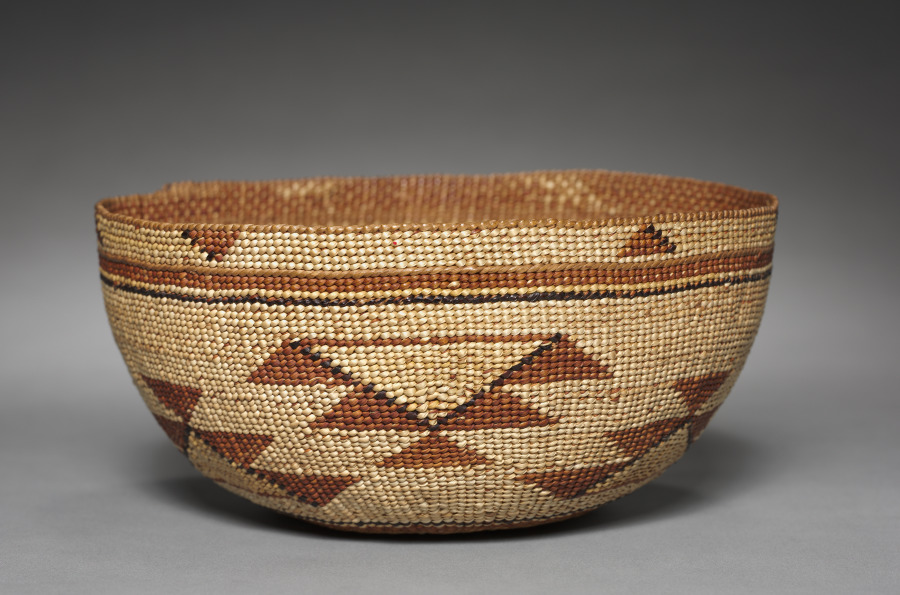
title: Hat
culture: California, late 19th- early 20th century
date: c 1875–1917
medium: plain-twined hazel with decoration in beargrass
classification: Basketry